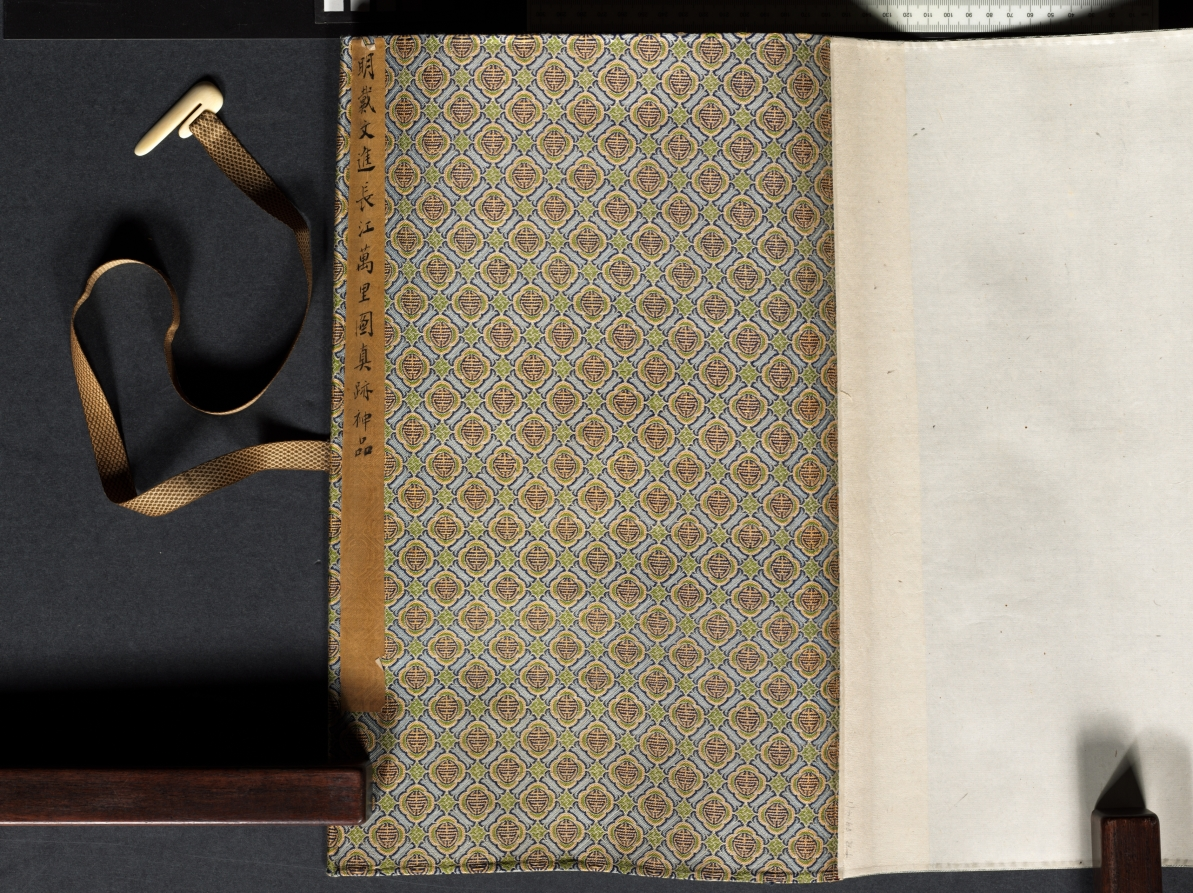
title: Ten Thousand Li of the Yangzi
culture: China, Ming dynasty (1368–1644)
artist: Dai Jin (Chinese, 1388–1462)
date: c. 1400s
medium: Handscroll; ink and color on paper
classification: Painting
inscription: Two colophons at end. Artist's seals: Dai Jin 戴進 and Wenjin 文進.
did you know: Dai Jin is traditionally considered the founder of the Zhe School, a style of landscape painting.